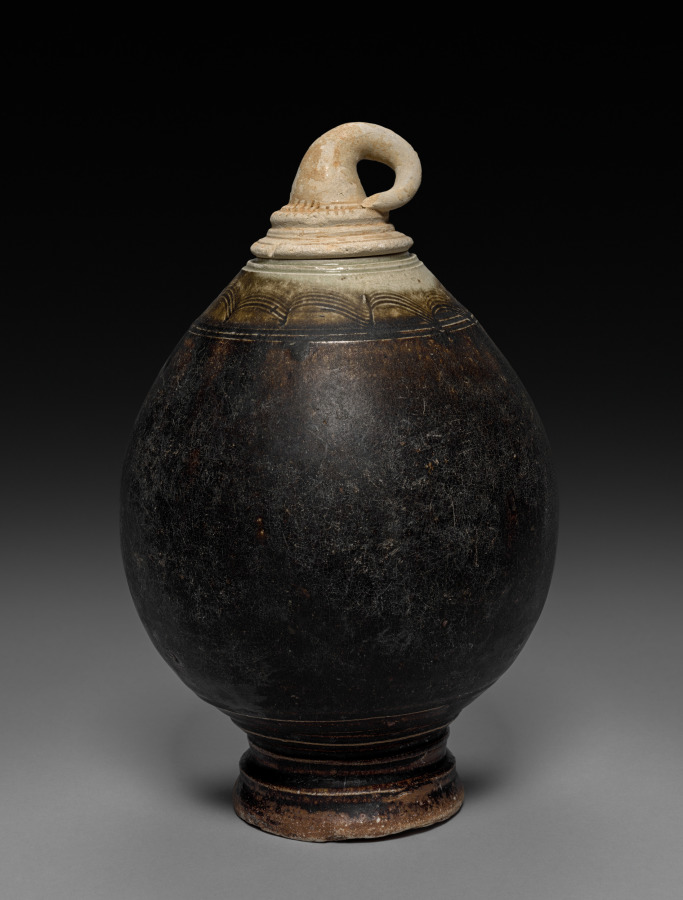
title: Jar in the Shape of a Fruit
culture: Cambodia, Northeast Thai kiln, Khmer Ware, Angkor Wat/Bayon period, 12th century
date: 1100s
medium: glazed pottery with brown slip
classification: Ceramic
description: This dark-brown glazed jar, with the heavy clay body and translucent glaze on the cover and the top just below it, has a rare shape of a fruit. It has a narrow foot with several moldings and incised wavy pattern immediately below the cover which is shaped in the form of a curling fruit stem that forms a handle. It is difficult to determine what type of fruit was meant, possibly a squash.